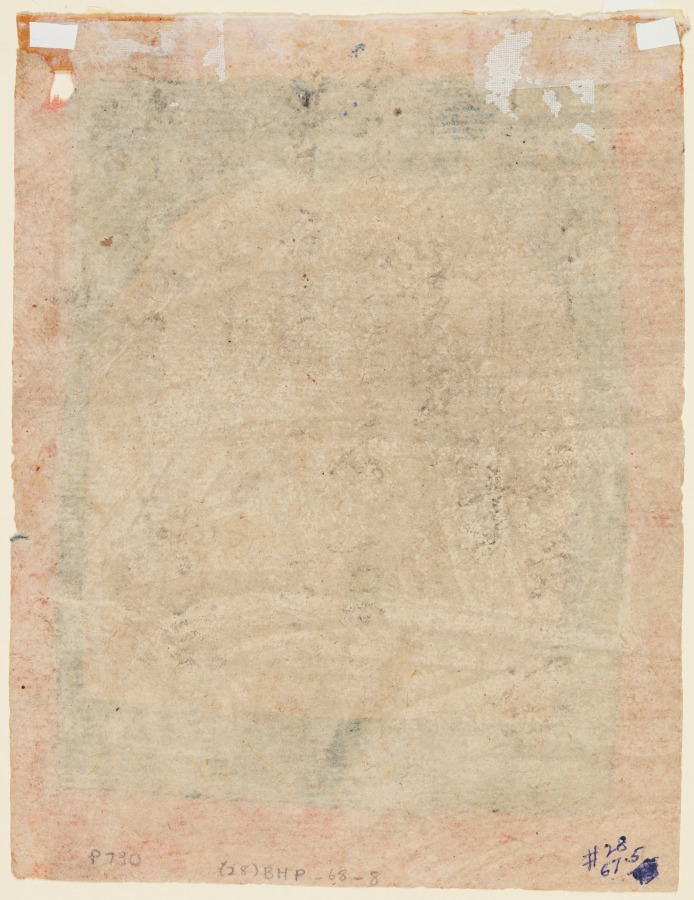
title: Posthumous portrait of Raja Chhatar Singh of Chamba smoking a hookah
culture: Northern India, Pahari kingdoms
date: c. 1700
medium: Gum tempera and ink on paper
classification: Painting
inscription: śrī raja chatara sīgha cībeyaḷa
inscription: rājā catara siṃgha cambā vāla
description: Raja Chattar Singh’s reign, from 1664 to 1690, is considered to be a period of prosperity for Chamba. During that time, boundaries of the kingdoms were expanded, and the economy thrived. He is best known for defying the Mughal emperor Aurangzeb’s orders to demolish all the Hindu temples in his realm. Instead, he installed copper gilt wooden umbrellas on the temples, many of which exist to this day.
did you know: The Raja wears a Central Asian robe instead of the popular Mughal jama.